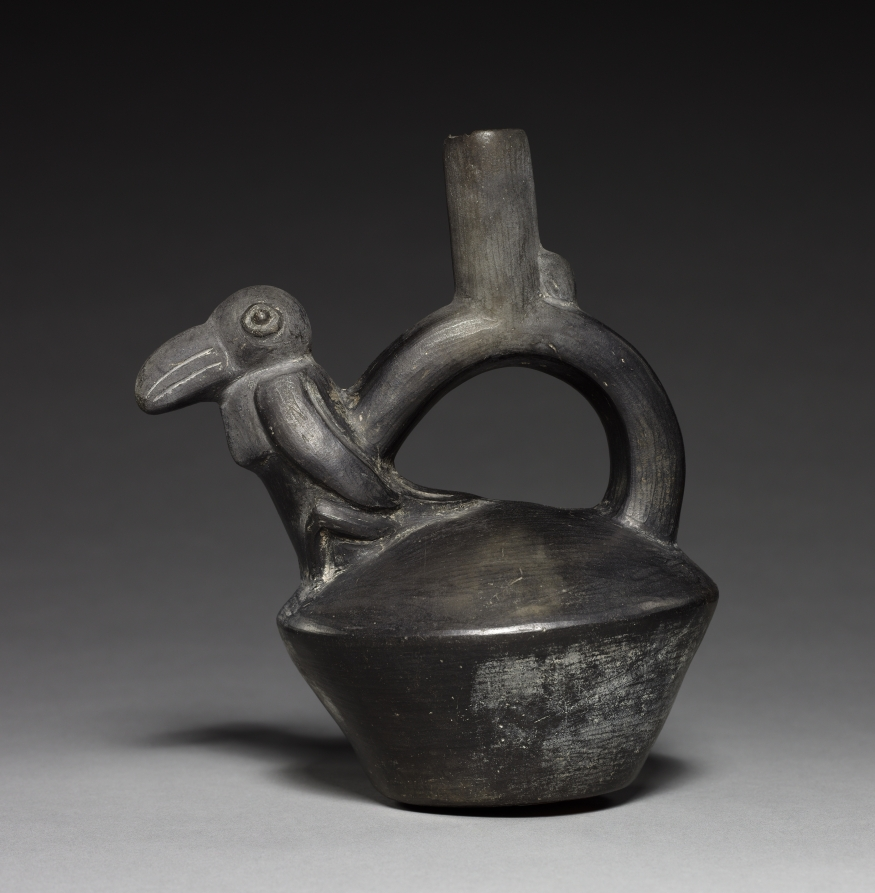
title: Vessel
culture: Peru, Chimú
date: 1300–1400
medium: black ware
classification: Ceramic